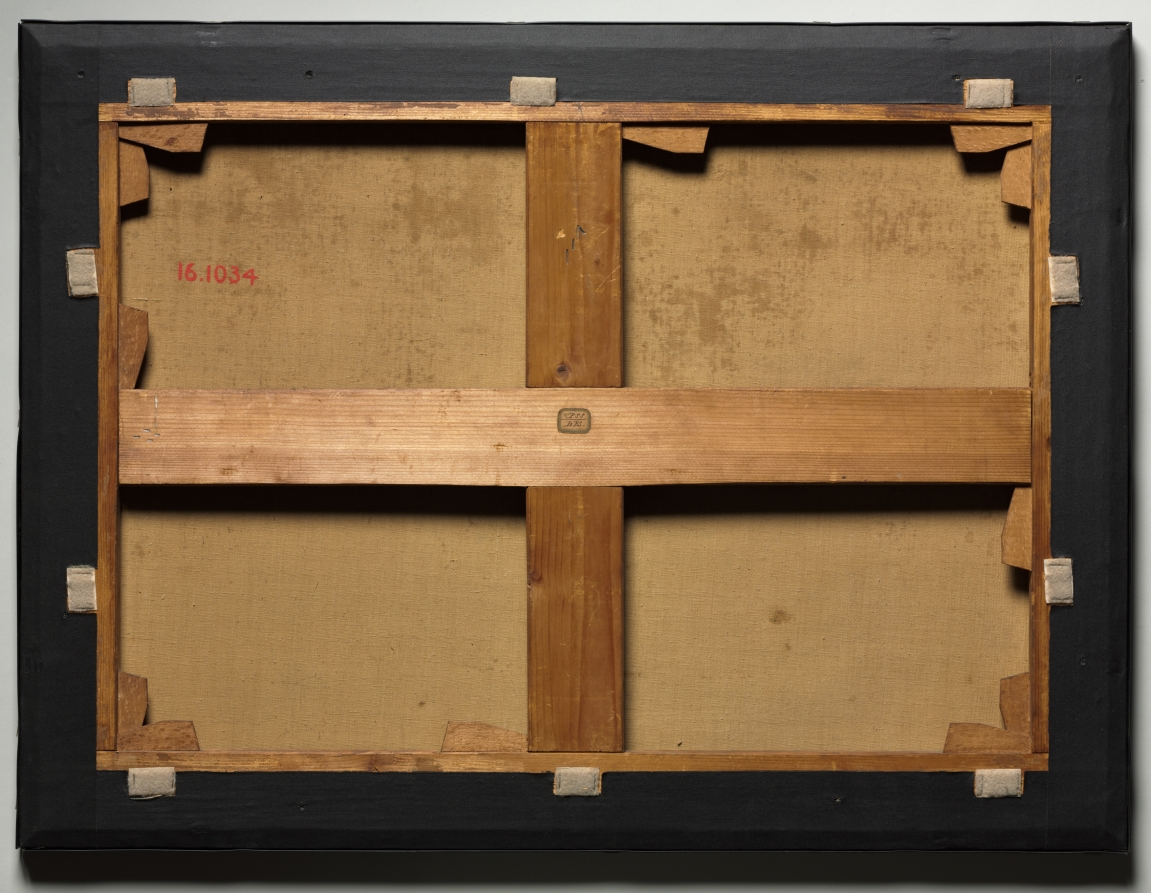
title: Greek Pirates Attacking a Turkish Vessel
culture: France, 19th century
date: not dated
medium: oil on fabric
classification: Painting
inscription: Signed lower left: E Isabey. 1827